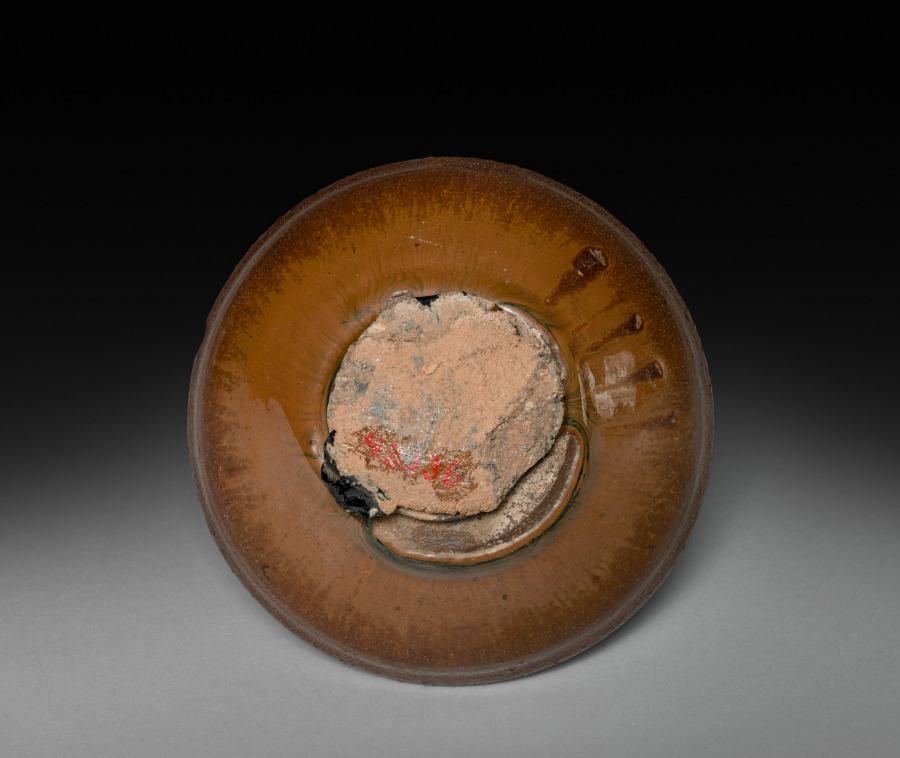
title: Tea Bowl: Jian ware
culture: China, near Shui ch'i, Song dynasty (960-1279)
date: 960–1279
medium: stoneware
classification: Ceramic